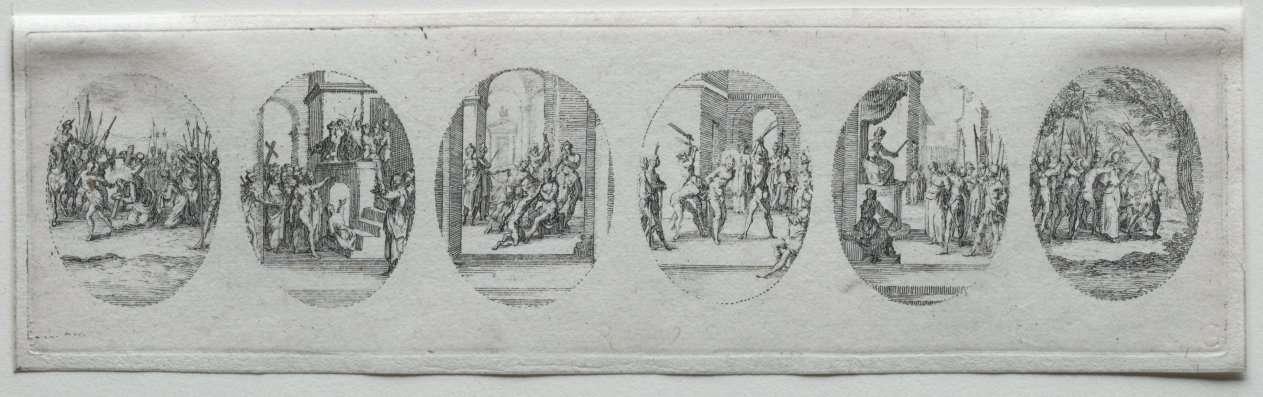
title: The Mysteries of the Passion: Christ before Pilate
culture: France, 17th century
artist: Jacques Callot (French, 1592–1635)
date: 1631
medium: etching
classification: Print